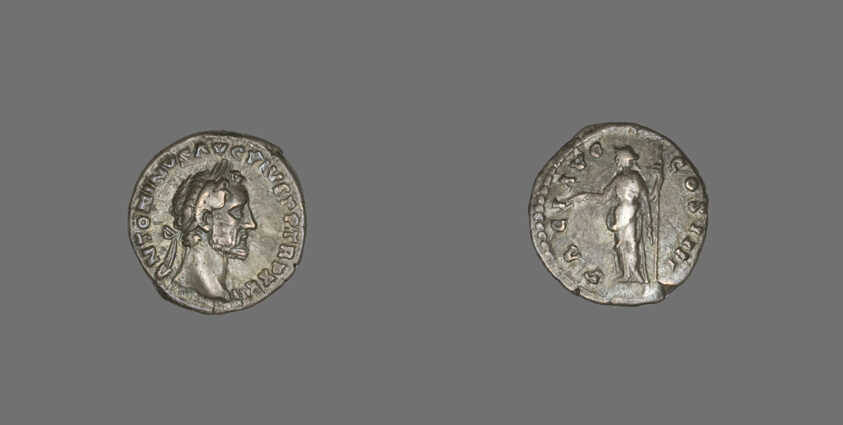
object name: Coin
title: Denarius (Coin) Portraying Emperor Antoninus Pius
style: roman (ancient, style or period), ancient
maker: Roman, minted in Rome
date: 160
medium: Silver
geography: Roman Empire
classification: coin; ancient art; struck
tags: goddesses